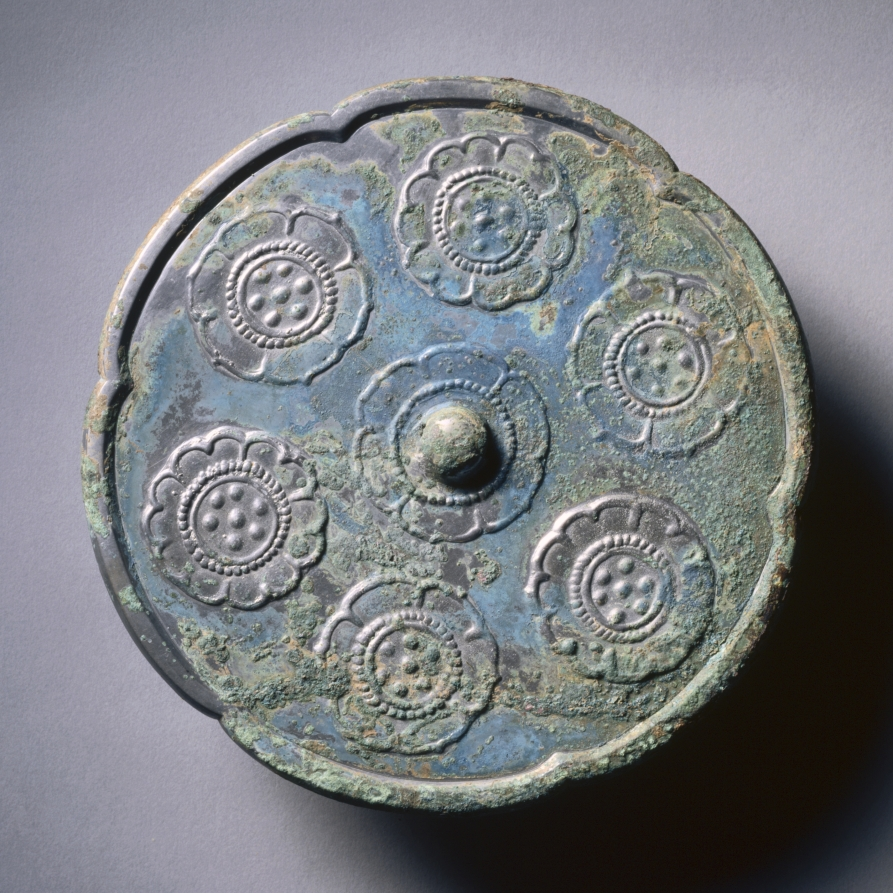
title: Lobed Mirror with Six Blossoms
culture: China, Tang dynasty (618-907)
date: mid-600s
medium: bronze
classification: Metalwork